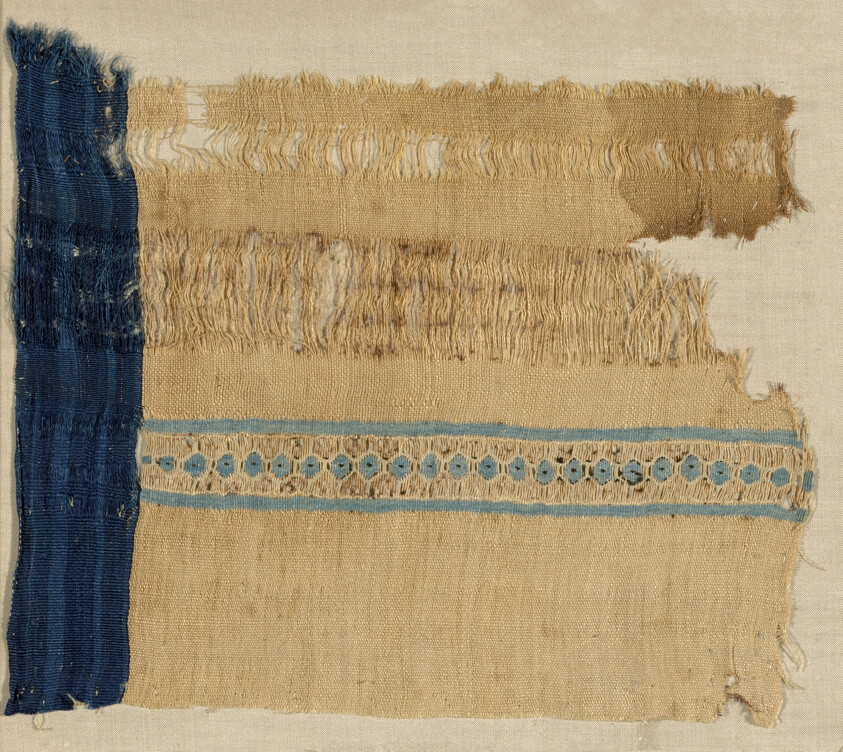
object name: Textile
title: Fragment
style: mamluk, arabian, ayyubid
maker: Egypt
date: Arab period (641–969)/Fatimid period (969–1171)/Ayyubid period (1171–1250)/ Mamluk period (1250–1517), 9th/13th century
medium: Linen and silk, slit tapestry weave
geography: Egypt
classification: textile; weaving